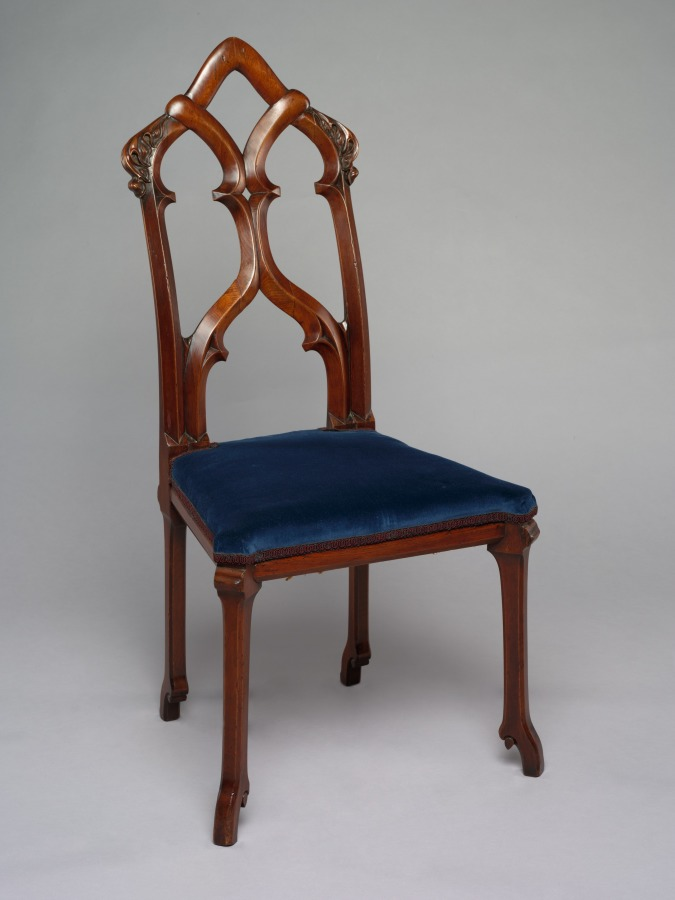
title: Side Chair: Gothic Revival Style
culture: America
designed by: Alexander Jackson Davis (American, 1803–1892)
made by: William Burns (American, 1805?–1867)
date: c. 1858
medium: wood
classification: Furniture and woodwork